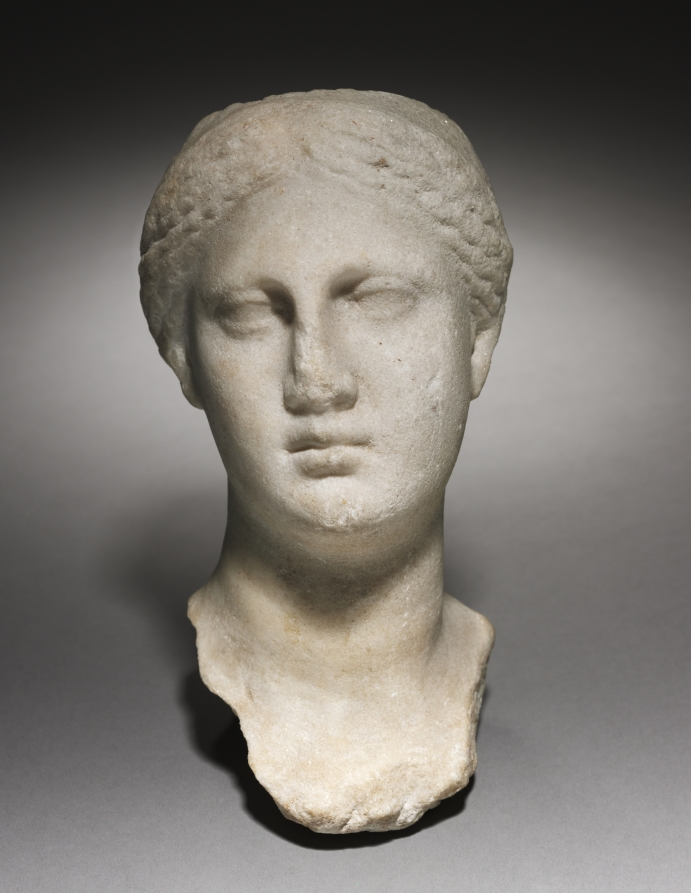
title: Head of a Woman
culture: Greece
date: 400–200 BCE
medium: marble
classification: Sculpture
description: This marble bust of a woman is rendered with the soft, delicate features typical of Greek sculpture of the late fourth and early third century BCE. Her features nearly disappear into the smooth landscape of her face, each curve fading softly into the next. Her hair is held away from her forehead in a series of tight braids pulled back to a bun, now mostly lost.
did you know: Though this hairstyle is often associated with sculptures of Aphrodite, it was also a popular style among mortal Greek women.